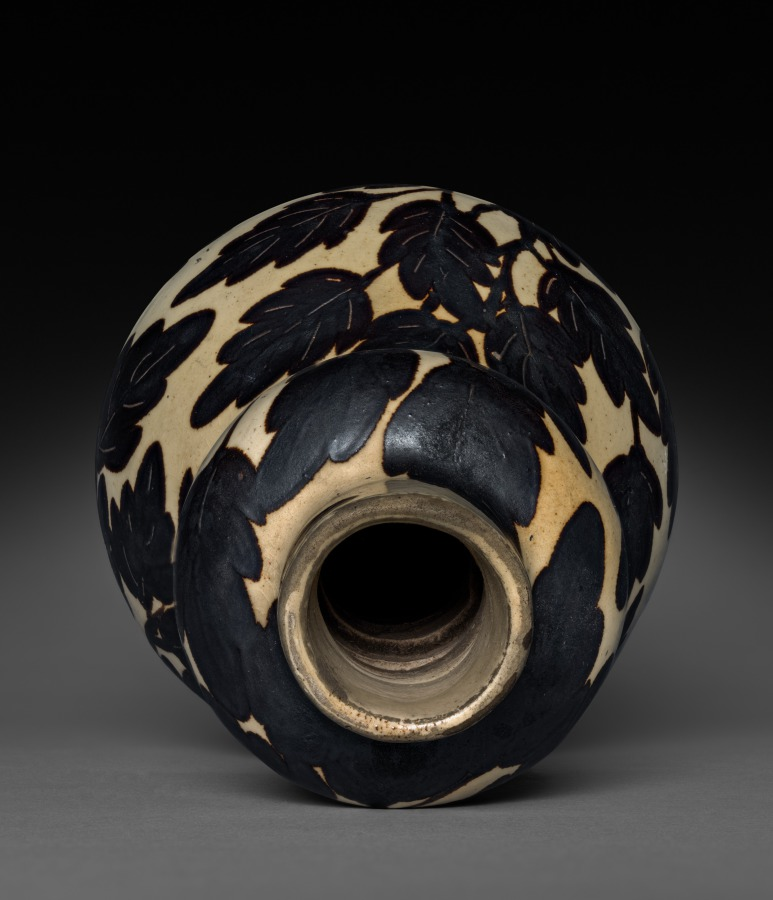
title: Gourd-shaped Vase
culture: China, Ming dynasty (1368–1644)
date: 1368–1644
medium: porcelain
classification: Ceramic